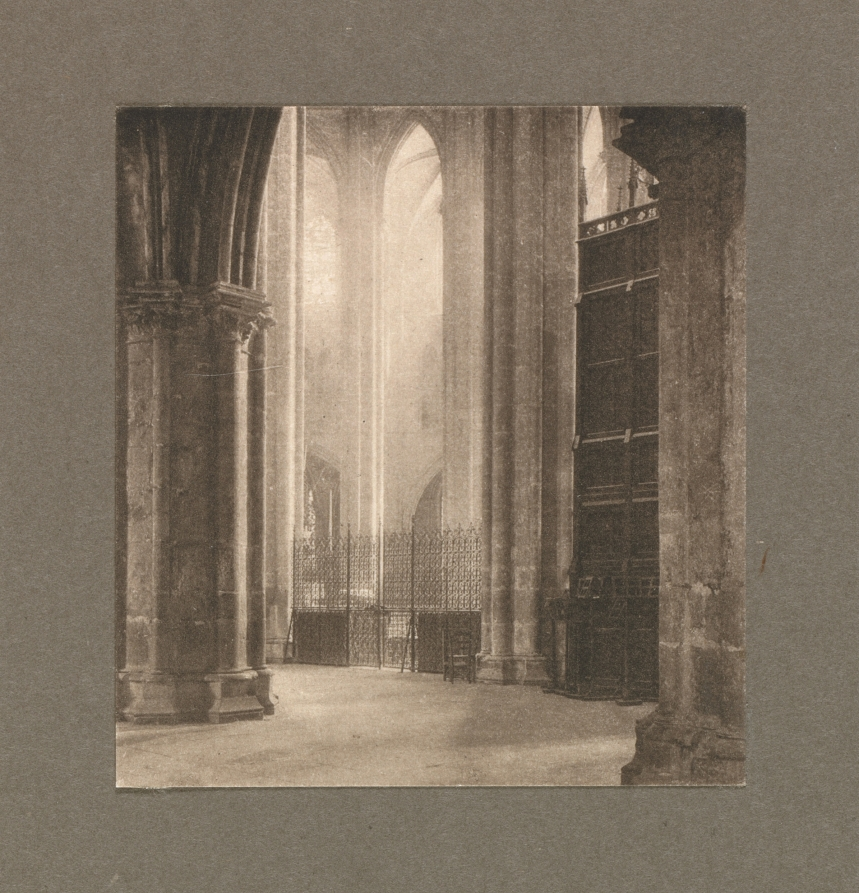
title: Camera Work: Height and Light in Bourges Cathedral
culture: England, 20th century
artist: Frederick H. Evans (British, 1853–1943)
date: 1903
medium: photogravure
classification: Bound Volume